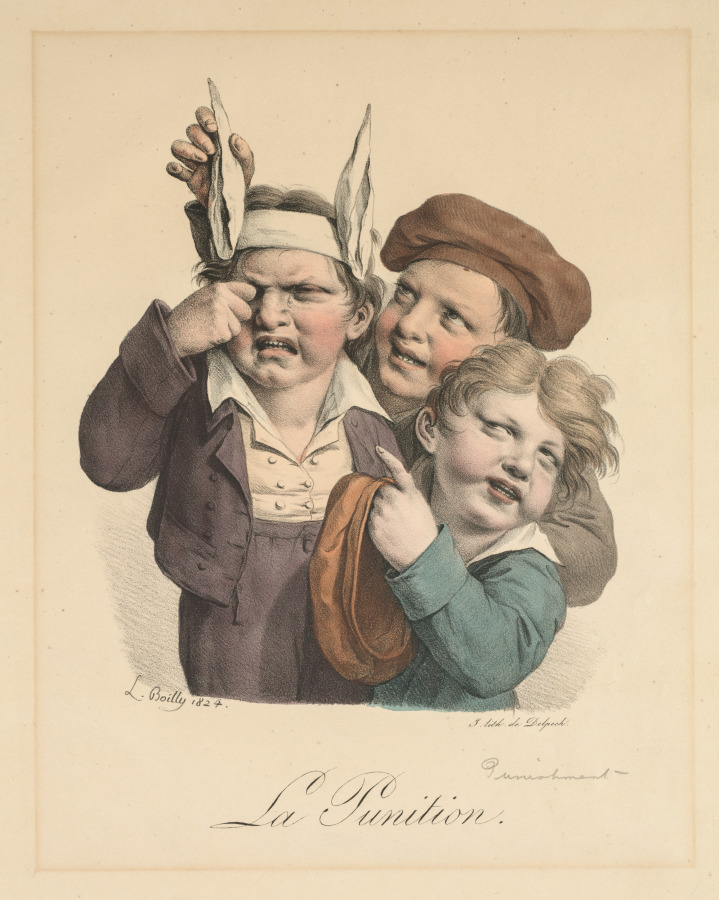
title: Punishment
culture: France, 19th century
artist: Louis Léopold Boilly (French, 1761–1845)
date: 1821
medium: color lithograph with hand coloring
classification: Print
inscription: lower right of image, in graphite: Punishment